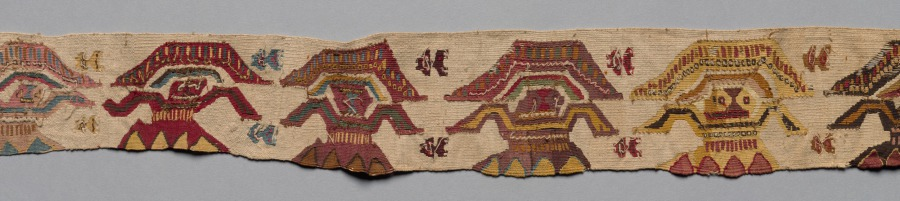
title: Lower Border of a Garment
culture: Central Andes, North Coast, Chimú or Lambayeque (Sican) People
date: 1000–1470s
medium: tapestry; wool and cotton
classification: Textile